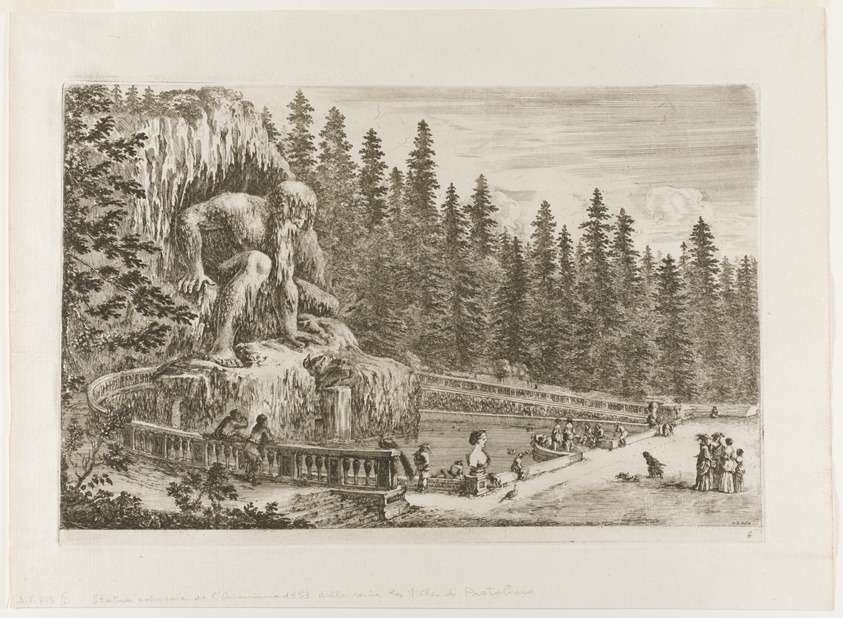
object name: Print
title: The Colossal Statue of the Apennines, from Views of Villa di Pratolino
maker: Stefano della Bella (Italian, 1610-1664)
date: c. 1653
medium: Etching in black on ivory laid paper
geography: Italy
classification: etching; print; prints and drawing